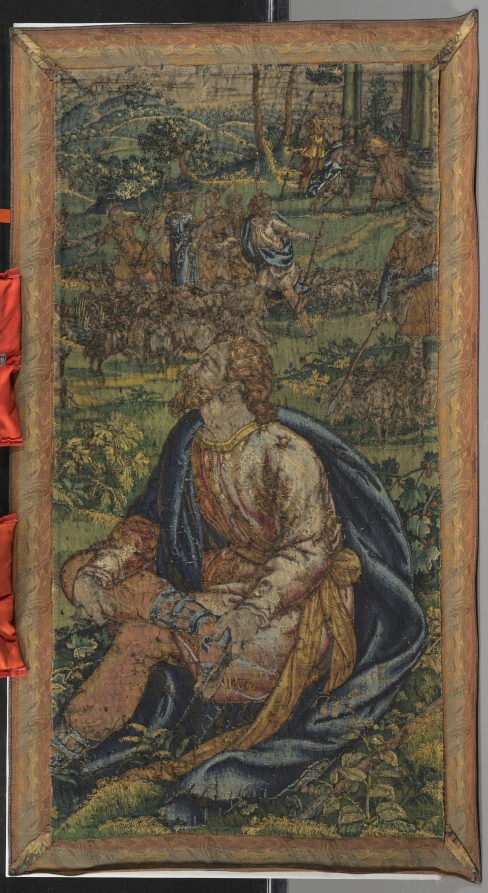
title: Moses and Jethro's Daughter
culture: Flanders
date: 1600s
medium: Wool: tapestry weave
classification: Tapestry